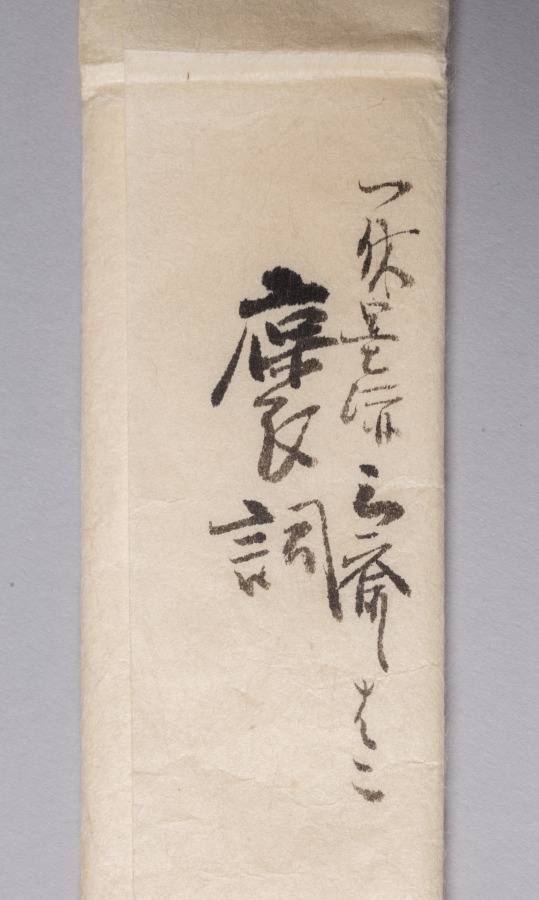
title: Calligraphy with Willow and Swallows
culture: Japan, Muromachi period (1392–1573)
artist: Ikkyū Sōjun (Japanese, 1394–1481)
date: 1400s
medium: hanging scroll, ink on paper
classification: Painting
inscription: How many days has it rid itself of the crow’s cloth? It knows not!/ Lovely is its body so nimble and neat./ Neither men of wealth, courtly position, or power can come close to the unfettered, noble swallow!/ With the coming of spring, it seems to be flying about, dancing around the grass hut of the foolish Priest. signed: Unkasō Isshi Tōkai jun Ikkyū shi ga ippitsu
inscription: outer box inscribed: Ikkyū Ōshō Enshi-zu Jigasan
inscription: inner box side lid inscribed: Showa 50 (1975), November by Tayama Honan with kao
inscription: Inner box side lid inscribed: Ikkyū Ōshō Bokuseki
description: The famed Buddhist monk Ikkyū is best remembered for his calligraphy. Calligraphic conventions of his time called for brushwork that did not vary much in style from character to character. However, as Ikkyū’s lines progress, his brushwork wanders between standard script and a sort of shorthand, marked by an uneven distribution of ink and a reduction of the characters to only the most necessary strokes. Ikkyū’s direct communication of emotion via brushwork became characteristic of the works produced by monks affiliated with the temple Daitokuji later in the Edo period (1615–1868).